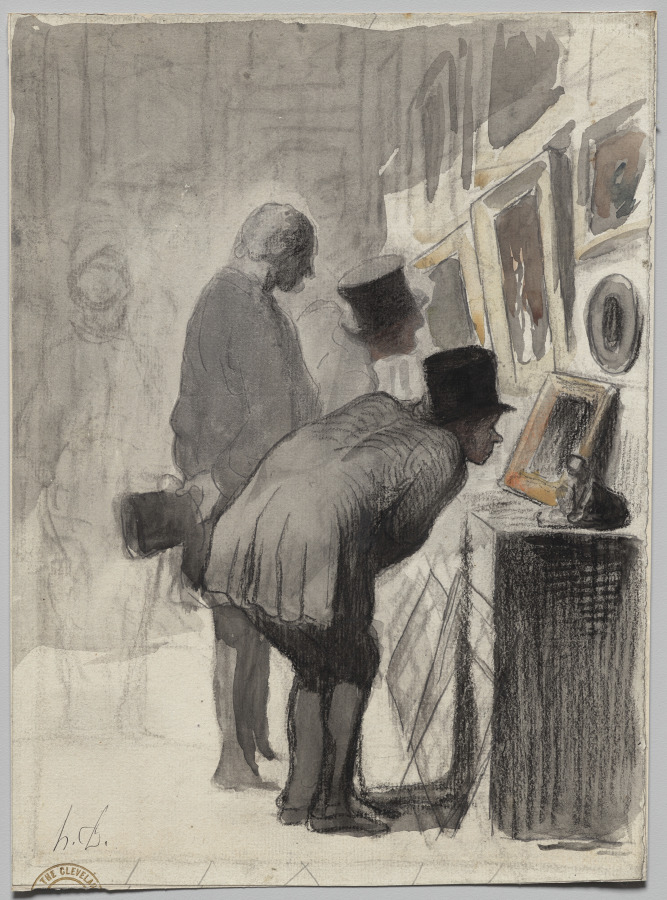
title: Art Lovers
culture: France, 19th century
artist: Honoré Daumier (French, 1808–1879)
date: c. 1863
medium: Gray and black wash, charcoal, and graphite, with watercolor, on cream laid paper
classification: Drawing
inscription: signed, lower left, in black ink: h.D.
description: Honoré Daumier was known for his witty depictions of contemporary Parisian types, including the art collectors seen in this drawing. The sheet belongs to a series in which the artist depicted these connoisseurs in the process of closely studying works of art. Although here, the men's focus seems sincere, in many works Daumier caricatured his subjects' greediness, smugness, or obliviousness.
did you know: Honoré Daumier produced watercolors primarily for collectors of his work, suggesting that this image, somewhat ironically, was intended to be sold to the very figures it depicts.